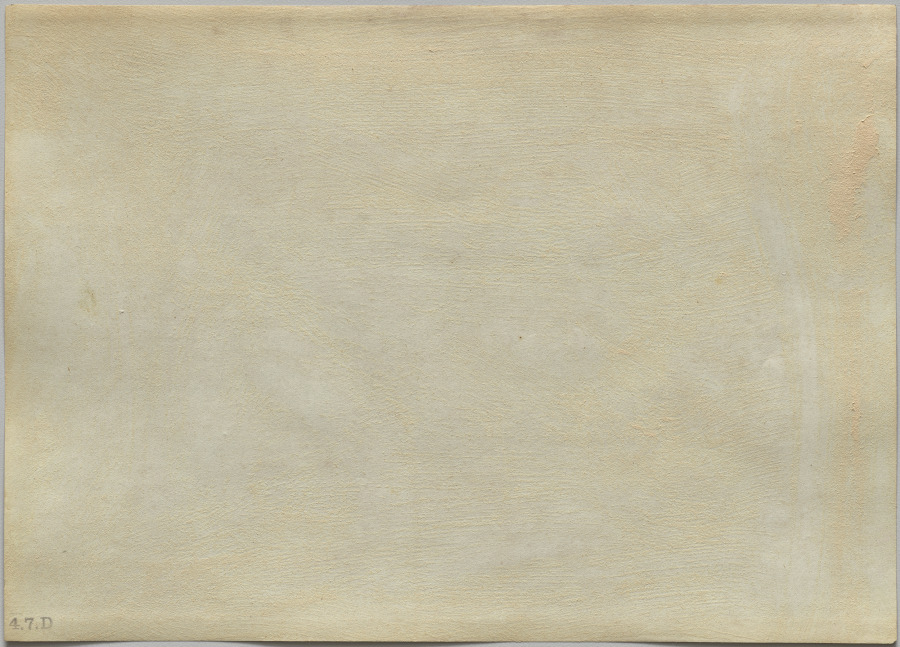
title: Elephant Battery on March at Jhansi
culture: India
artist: Raja Deen Dayal (Indian, 1844–1905)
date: c. 1882–87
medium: albumen print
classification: Photograph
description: These photographs are part of an album, now disassembled, of around 105 photographs taken in India between 1885 and summer 1887 that provide glimpses into the lives of the British colonial elite and royal and upper-class Indians. The museum holds another group of 37 pictures from this album (2016.266), which was probably commissioned by a British civil servant visiting or working in India around 1888 as a personal souvenir of his experiences there.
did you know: Raja Deen Dayal is regarded now, and was considered during his lifetime, to be India’s most important 19th-century photographer.